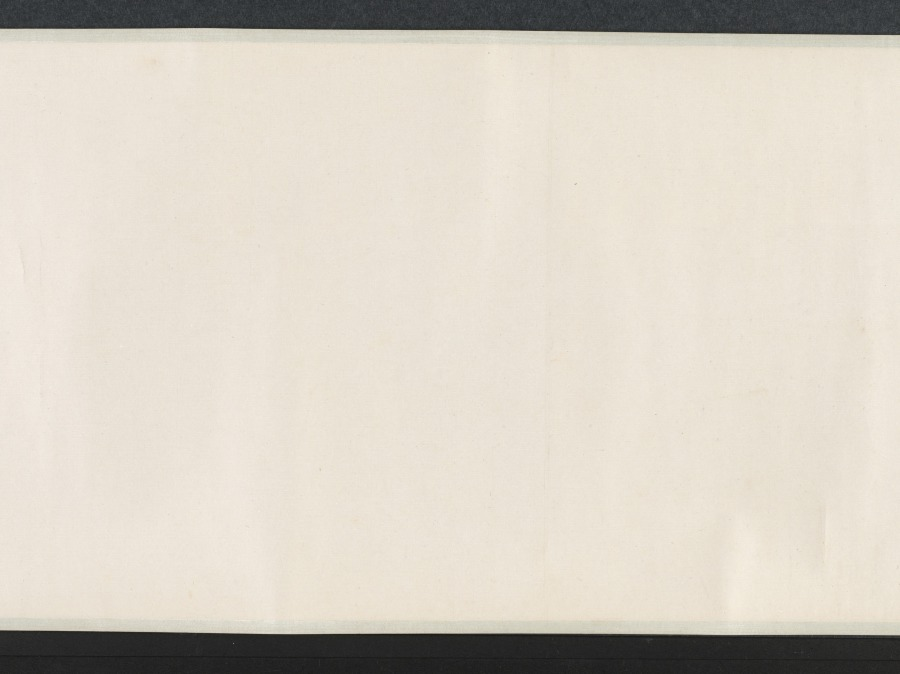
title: Nine Songs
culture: China, Yuan dynasty (1271-1368)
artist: Zhang Wo (Chinese, active c.1336–after 1364)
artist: Chu Huan (Chinese, active 1361)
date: 1361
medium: handscroll; ink on paper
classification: Painting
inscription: 7 colophons and 47 seals: 1 colophon, dated 1361, and 28 seals of Chu Huan 褚奐 (active c. 1361); 1 colophon, dated 1785, and 1 seal of Lu Shihua 陸時化 (1714-1779); 2 seals of Lu Yü-ch'ing (18th c.); 1 colophon, dated 1935, of Ye Gongchuo 葉恭綽 (1881-1968); 1 colophon, dated 1935, of Wu Hufan 吳湖帆(1894–1968); 1 colophon, dated 1938, and 1 seal of Wang Tongyu 王同愈 (1856-1941); 1 colophon, dated 1941, of Wu Huayuan 吳華源 (1893-1972); 1 colophon, dated 1942, and 9 seals of Xu Bangda 徐邦達 (1911–2012); 1 colophon, dated 1942, of Lang Jingshan 郎靜山 (1892-1995); 1 colophon, dated 1944, of Tang Yun 唐雲 (1910-1993); 6 seals of Wang Jiqian [C.C. Wang] 王季遷 (1907–2003).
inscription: Text of The Nine Songs written by Chu Huan at the end of each section.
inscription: 右離騷九歌圖，宋龍溟居士李公本，淮南張渥叔厚所畫妙絕當世。家藏請予書其辭目識于左。至正二十一年辛醜三月旦河南褚奐記。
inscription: Colophon by Lu Shihua 陸時化 (1714–1789): This scroll is fortunate to have been handed down from collections of the right people. Now, after 500 years, its condition is as good as when it was painted. I acquired this from Mr. Shen Guiyu [1673-1769], the President of the Board of Rites. The label is in his handwriting when he was 95 years old. I submit that Chu Huan (t. Shiwen) of the Yuan Dynasty was a native of Qiantang. His "seal" and li writings are in the style of Wu Rui. For example, in [Chu Kuei's] Ming ji lu [A list of masterpieces] is recorded the stele commemorating the restoration of the prefectural school of Kun-shan, the text of which was composed by Yang Weizhen in the twenty-first year of Zhizheng [1361]; and the calligraphy as well as the title in li style was by Chu Huan, who was at that time an assistant judge of the prefecture of Haining in the circuit of Hangzhou. Zhang Wo's zi is Shuhou (叔厚). His literary name is Zhen Qisheng (贞期生). According to [Gu Ying's] Yu shan cao tang ya jii, he liked to paint in the bai-miao or the "pure delineation" style after the method of Li Longmian [Li Gonglin 李公麟], which finds no peer among the ancient masters. This is agreed upon [by Pei Ch'iung] in his Qing jiang zhi who praised [Zhang Wo] as being quite learned and well-versed in many branches of the arts, especially figure painting. Recorded by Lu Shihua [The mountain dweller], listening to the pine, in the twelfth month of the yisi year [1785].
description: Painted in the baimiao, or fine-line drawing style, this ancient work demonstrates the literati’s use of abstract calligraphic brushwork for self-expression. The subject of the “Nine Songs”—songs associated with shamanistic rituals in the ancient Chu kingdom—had traditionally provided artists with myths and legends that they could explore and reinterpret in their own works.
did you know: Divided into eleven sections, the scroll contains illustrations by painter Zhang Wu followed by a transcription of the relevant verse by calligrapher Chu Huan.